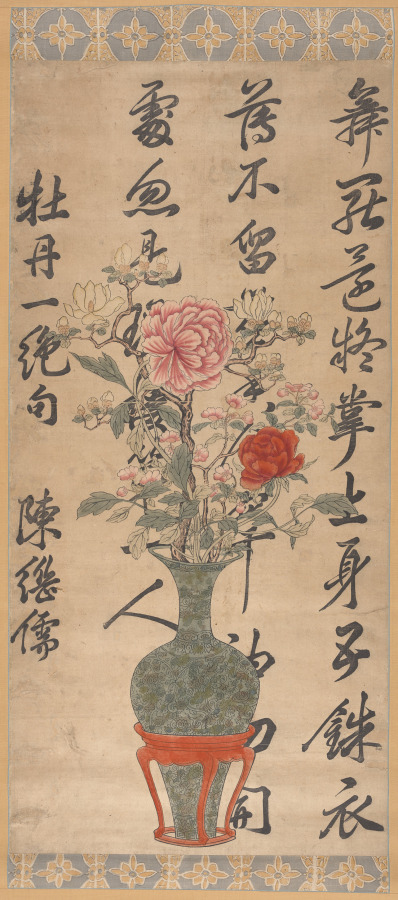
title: A Quatrain about Peonies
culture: China, Qing dynasty (1644–1911), Qianlong reign (1736–95)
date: 1736–95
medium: Hanging scroll; polychrome woodblock print; ink and color on paper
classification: Print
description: Woodblock printing in color reached its height in China in the 1600s to 1700s. It was executed by means of sets of separate blocks, each carved to print a different color.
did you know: In the 1600s, printing flourished in such Jiangnan cities as Nanjing, Suzhou, Hangzhou, and Huizhou, evolving from privately enjoyed illustrated books printed in color to more commercialized single-sheet color prints that were hung on walls and became part of the rich urban visual culture.